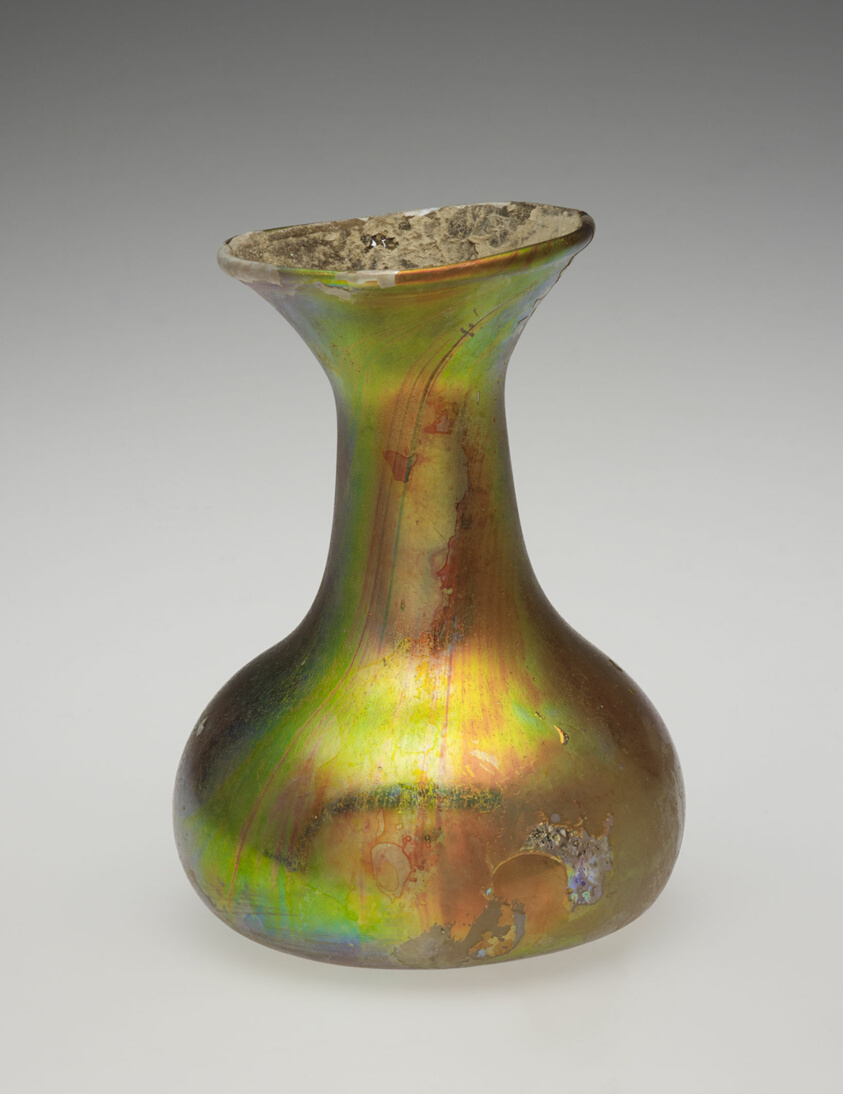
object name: Vessel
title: Bottle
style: syrian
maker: Roman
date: 2nd-3rd century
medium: Glass, blown technique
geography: Syria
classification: bottle; glass; vessel; ancient art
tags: containers